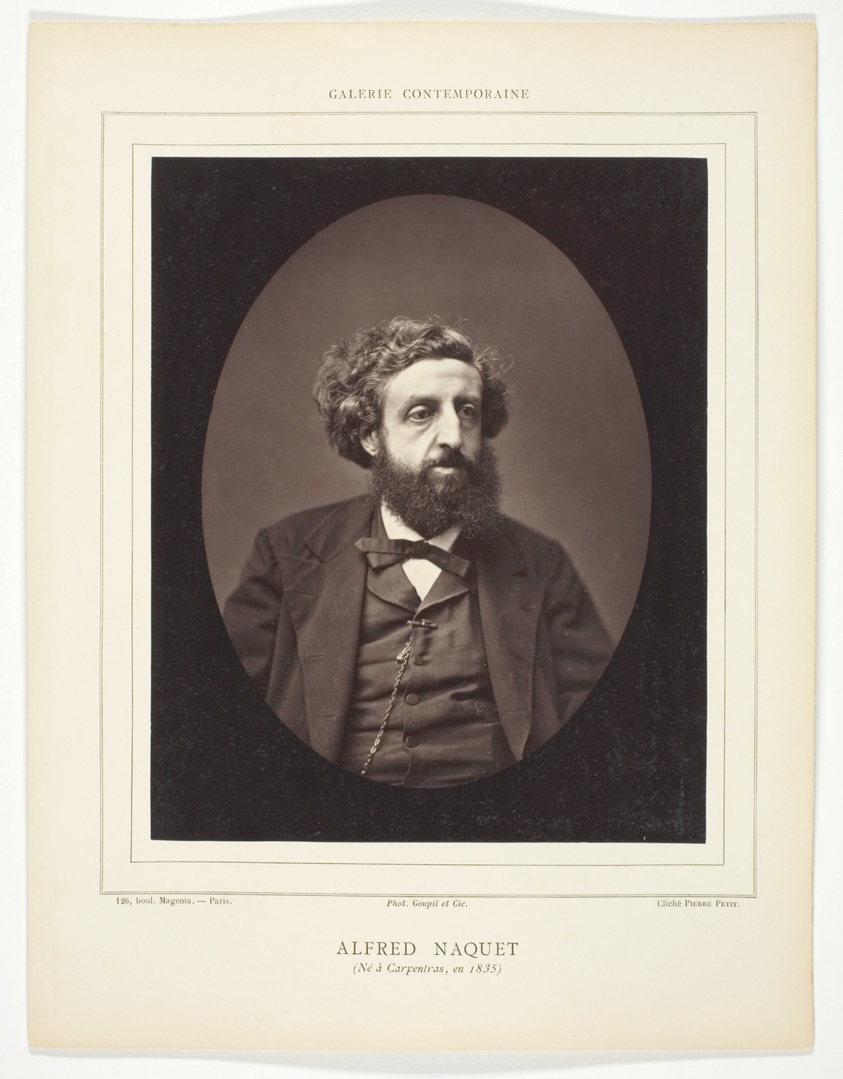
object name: Photograph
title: Alfred Naquet (French chemist and politician, 1834-1916)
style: 19th century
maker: Pierre Petit (French, 1832–1909)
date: c. 1876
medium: Woodburytype, from the periodical “Galerie Contemporaine Littéraire, Artistique” (1879), volume 7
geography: France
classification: woodburytype; photomechanical process; photography; photograph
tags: Collected by Hugh Edwards, Contemporaine Littéraire